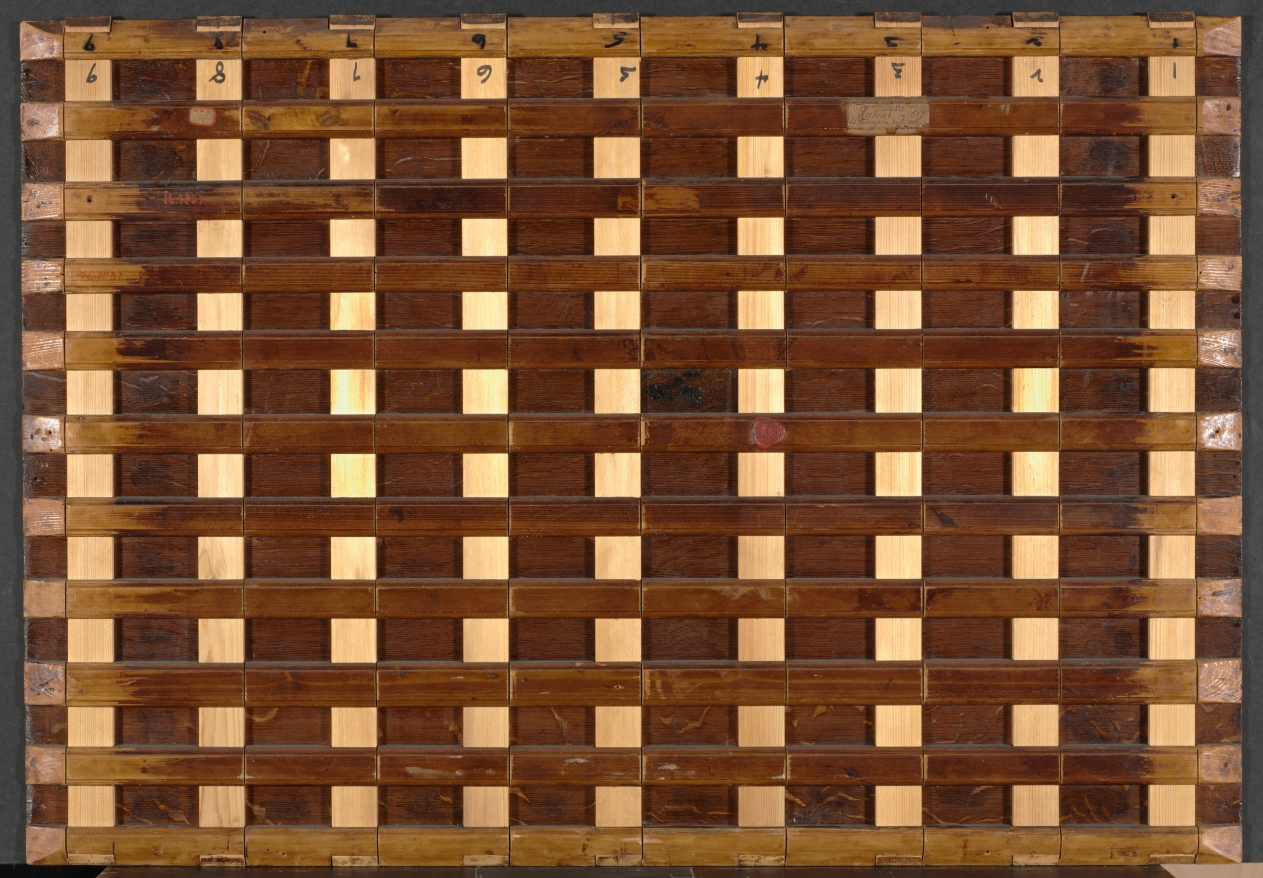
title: The Triumph of the Church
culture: Flanders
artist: follower of Peter Paul Rubens (Flemish, 1577–1640)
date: after 1628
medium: oil on wood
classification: Painting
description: This work is likely a copy after Rubens’s oil sketch for the Triumph of the Eucharist tapestry series. Isabella, daughter of King Phillip II of Spain, commissioned the tapestries for a royal monastery in Madrid. The finished tapestries still hang there today, and the original oil sketch is in the Museo del Prado, Madrid.